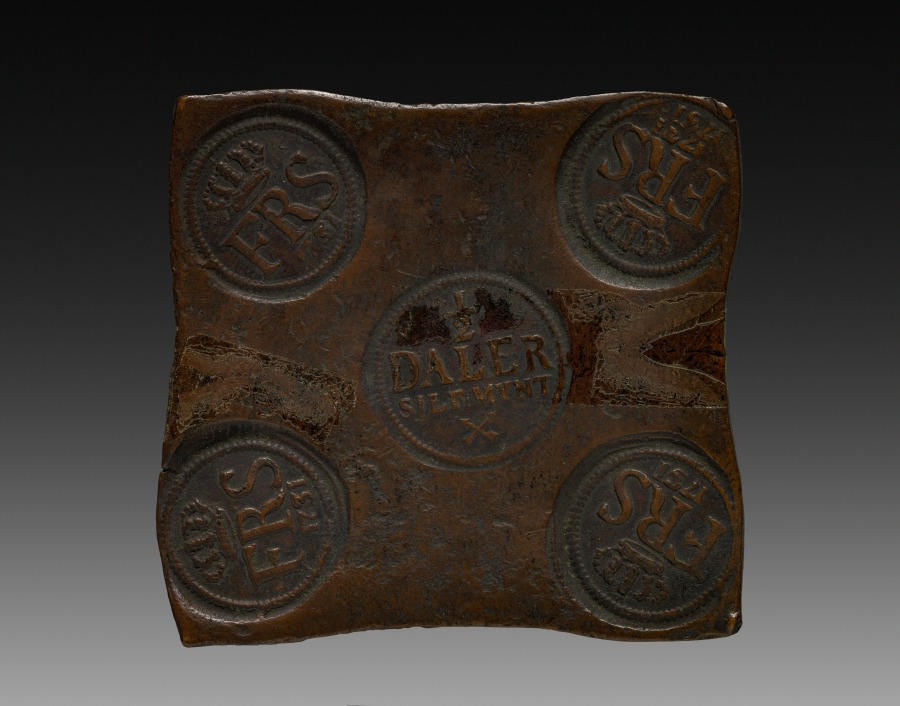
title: Swedish Plate Money (Half Daler)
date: 1731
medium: copper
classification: Metalwork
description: Some monetary denominations in Sweden were issued in large plates of copper and silver because the ores were plentiful. However, by the late 1770s these plates were considered too cumbersome, and consequently, Sweden began issuing some of Europe's first denominations in paper money.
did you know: This plate was worth a half daler, which was the standard unit of currency in Sweden in the 18th century.